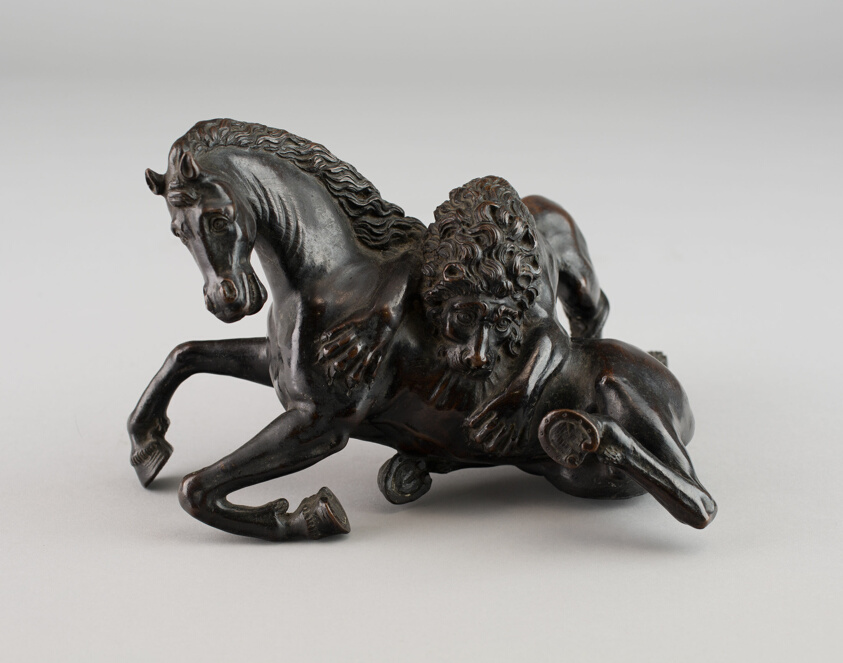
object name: Sculpture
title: Lion Attacking a Stallion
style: 17th Century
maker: Antonio Susini (Italian, active 1574–1624)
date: 1600/20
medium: Bronze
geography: Italy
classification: statuette; sculpture; bronze; Italian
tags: animals, horse, lions, violence